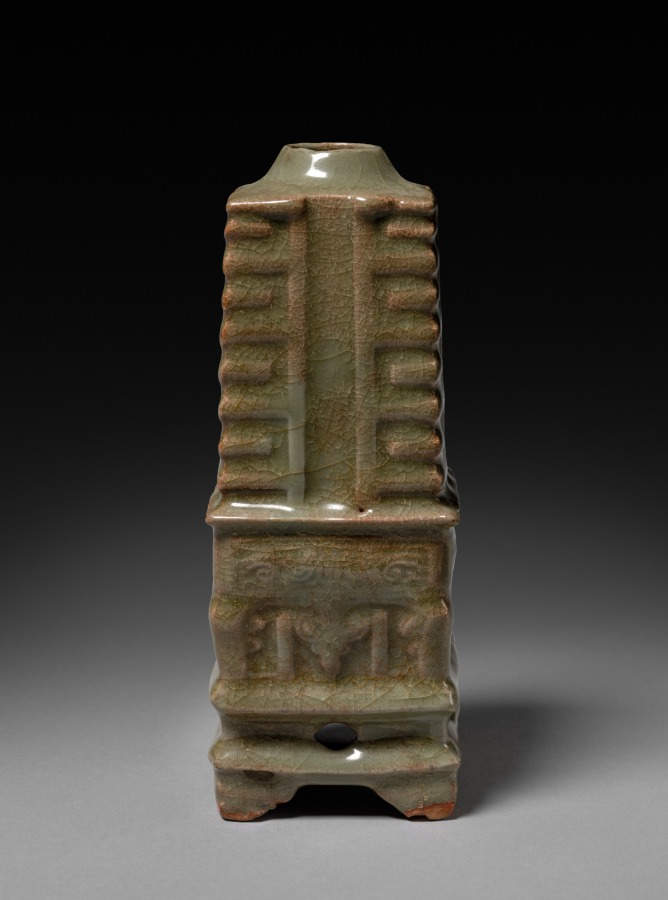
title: Vase in Shape of Cong: Southern Celadon Ware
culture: China, Zhejiang province, Yuan dynasty (1271-1368)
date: 1271–1368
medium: glazed buff stoneware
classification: Ceramic